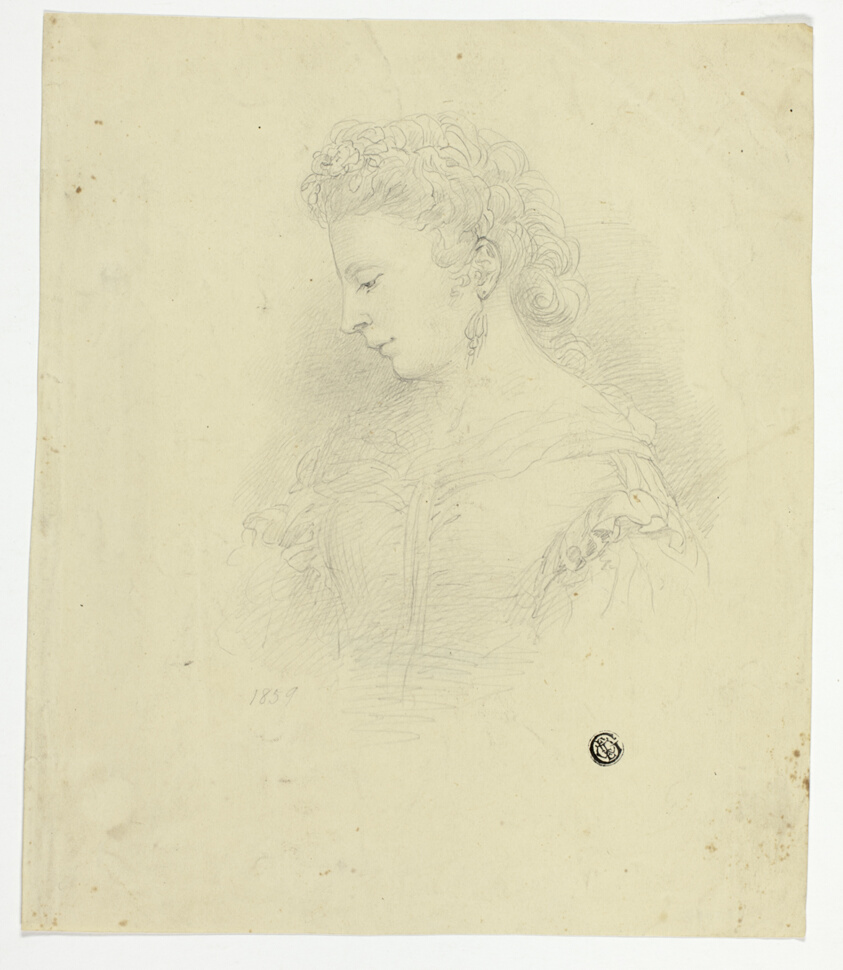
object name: Drawing and Watercolor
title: Portrait of a Young Woman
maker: Unknown Artist; British, 1800-1899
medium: Graphite on cream wove paper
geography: United Kingdom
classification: graphite; drawings (visual works); prints and drawing